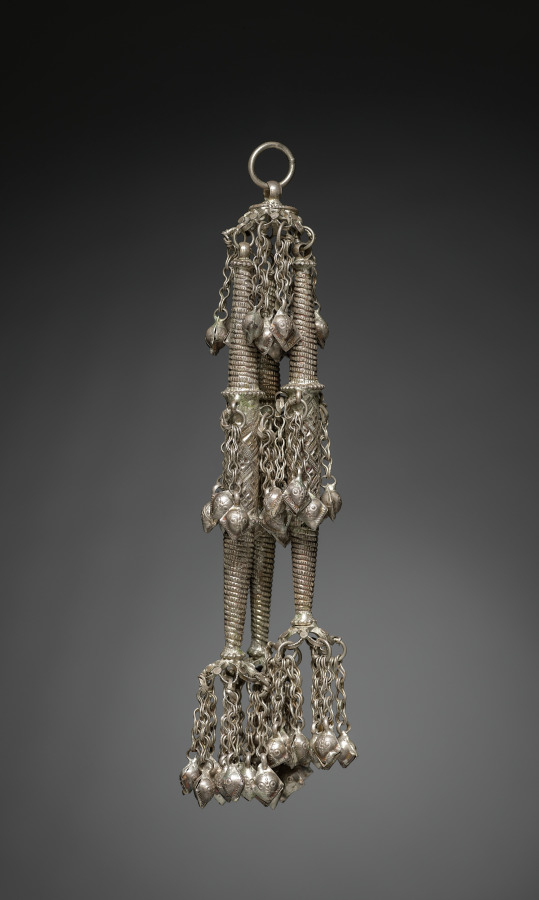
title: Hair pendant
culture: India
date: 1800s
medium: silver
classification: Jewelry